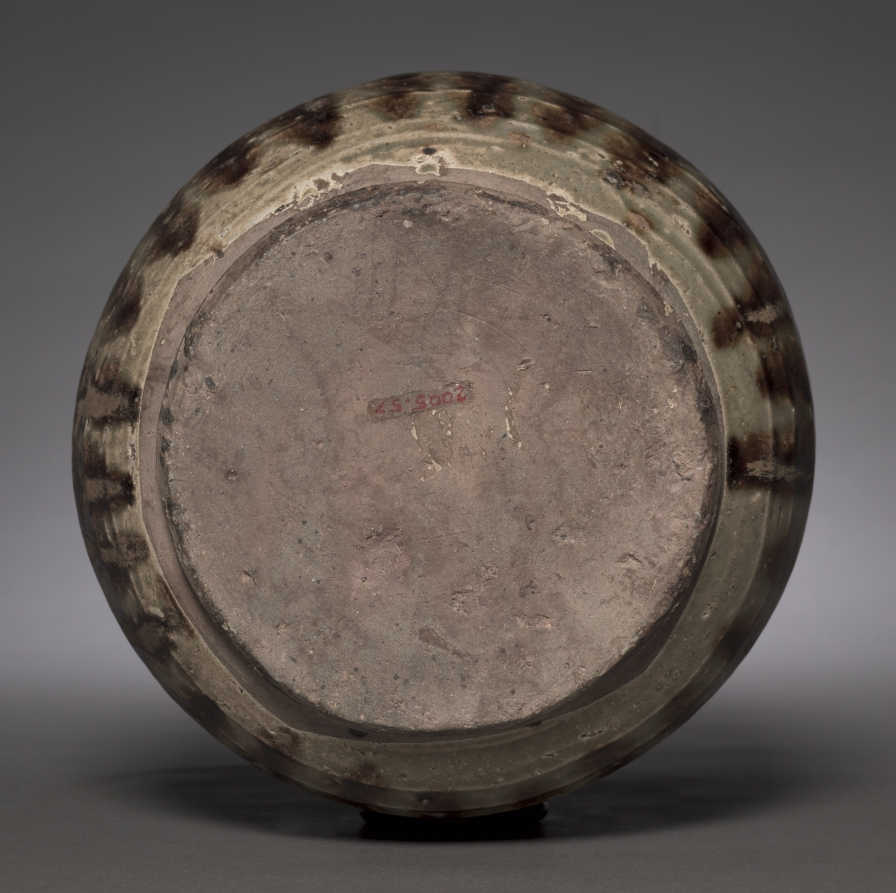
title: Ewer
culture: China, Hunan province, Tang dynasty (618-907)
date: 800s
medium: stoneware with olive-green glaze and ironbrown splashes, Changsha ware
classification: Ceramic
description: Used originally as a tea or wine ewer, this vessel has the strength of a Tang ceramic shape and the typical characteristics of Changsha ware, such as the stout proportions, the short, polygonal spout, and an overall color harmony and bold decoration. Its exterior is decorated with an olive-green glaze with iron-brown spots. The brown and the green glazes run into each other at certain areas during firing, creating a distinctive splashed-color effect. A more laborious treatment of the surface decoration makes this piece a rarity among surviving Changsha specimens. Changsha ware was a line of popular ware widely used and distributed within China. Specimens have been excavated not only in Hunan province, the area of production, but also in Shaanxi, Henan, Hebei, Hubei, Anhui, Jiangsu, Guangdong, and Guangxi provinces. As valuable export commodities of Tang dynasty China, Changsha wares have also been found at ancient sites in Japan, Korea, the Philippines, Thailand, Indonesia, Pakistan, Sri Lanka, Iran, Iraq, Arabic Peninsula, and Egypt.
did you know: This piece reveals the unexplored stylistic relationship between sancai (three-color) polychrome wares from northern kilns and Changsha wares from southern kilns.